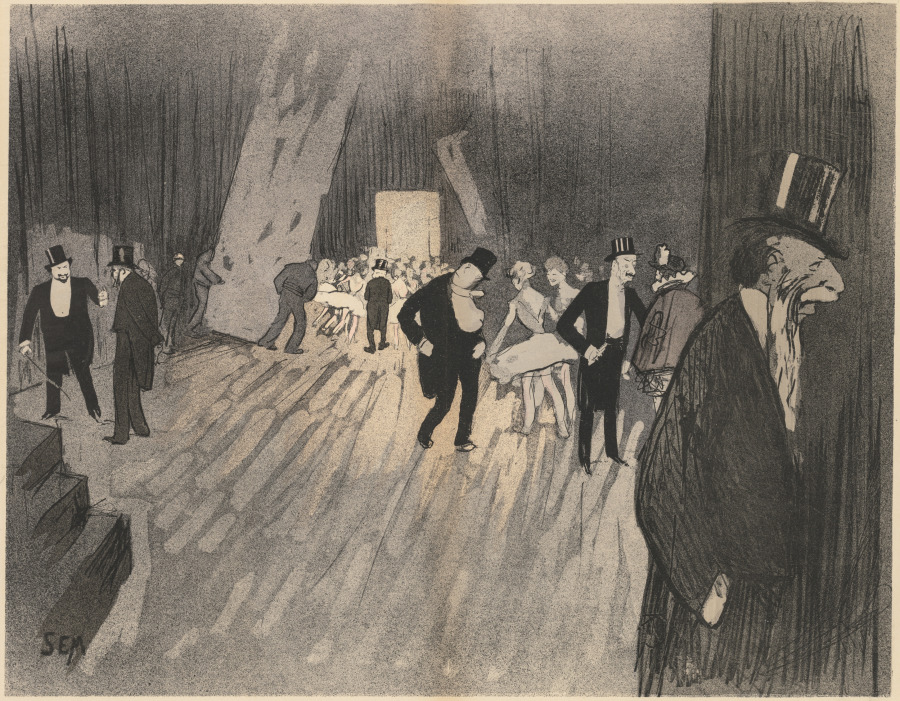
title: Backstage of the Ballet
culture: France, 19th century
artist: Sem (Georges Gourçat) (French, 1863–1934)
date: c. 1900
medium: lithograph hand-colored with watercolor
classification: Print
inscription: lower left, in stone: S.E.M.